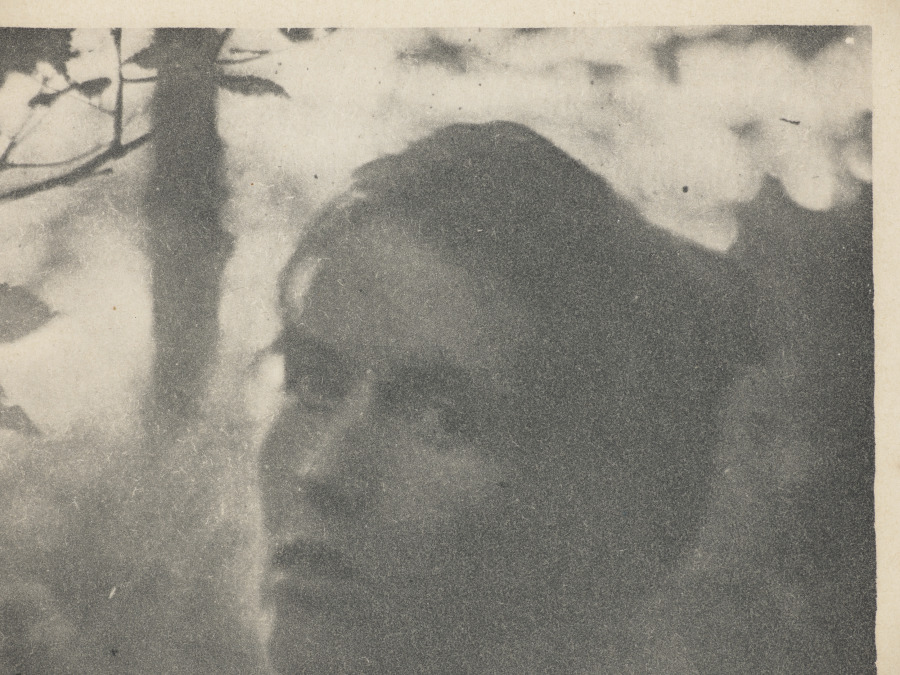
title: The Edge of the Wood - Evening (Letitia Felix)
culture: America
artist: Clarence H. White (American, 1871–1925)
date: 1900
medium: photogravure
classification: Photograph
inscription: Written in pencil on recto: "Clarence H. White [signed] '00"; in pencil on verso: " 'The Edge of the Wood-Evening'- / Clarence H. White"; in pen on verso: "Letitia Felix"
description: Clarence H. White experimented with an array of artistic media that blurred the lines between photography, drawing, and printmaking. Here are two examples of that experimentation: a platinum print on the left and a photogravure on the right. White was likely drawn to both processes for their broad tonal range and interaction of image and paper. To create platinum prints, a light-sensitive liquid emulsion is applied to and absorbed by the paper. The image forms within the paper’s fibers, resulting in a matte appearance. Because photogravures are printed like an etching, the image is formed with ink impressed onto the paper’s surface.